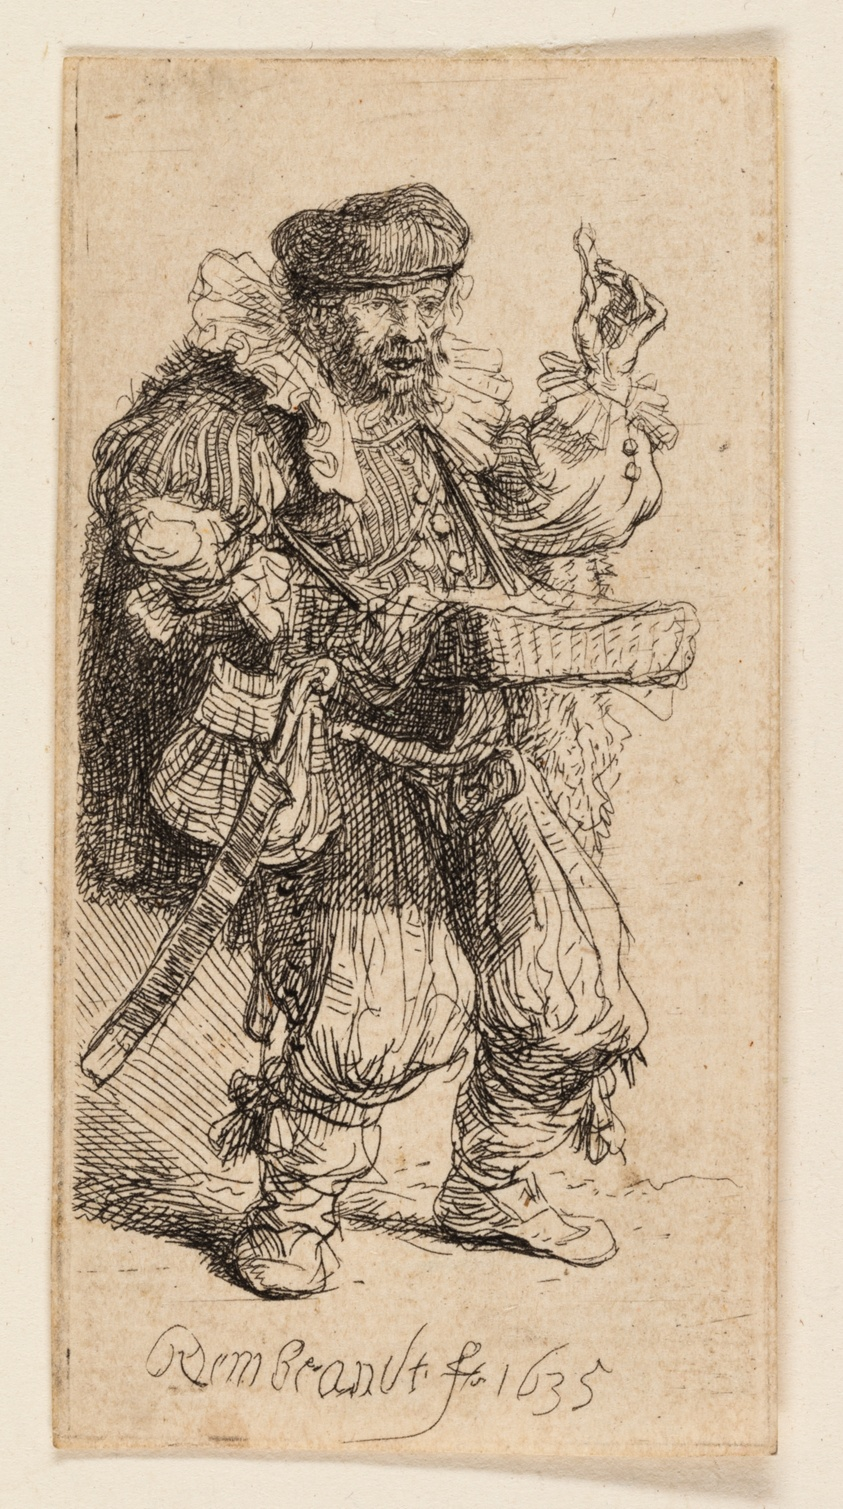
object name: Print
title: The Quacksalver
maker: Rembrandt van Rijn (Dutch, 1606-1669)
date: 1635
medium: Etching on paper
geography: Holland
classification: etching; print; prints and drawing; paper